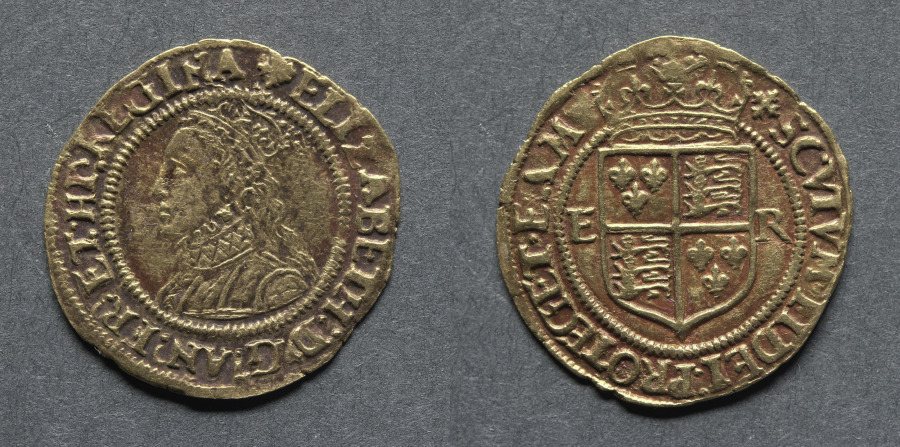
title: Halfcrown: Elizabeth I (obverse); Crowned Shield of Arms (reverse)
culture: England, Elizabeth I, 1558-1603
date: 1560–61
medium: gold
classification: Coins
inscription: ELIZABETH D G AN FR ET HI REGINA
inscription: SCVTVM FIDEI PROTEGET EAM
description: A rare coin, the portrait of the queen is very well executed. There are two types of this coin that feature a bust of the queen. They vary considerably, this one being less ornate than the second, 1969.184. Elizabeth I chose a Latin phrase, SCVTVM FIDEI PROTEGET EAM, translated as The Shield of Faith Shall Protect Her to appear on the reverse of some of her coins, befitting her precarious position.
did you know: This small coin, a halfcrown, would have been more accessible to ordinary citizens and their chance to see a portrait of the queen.